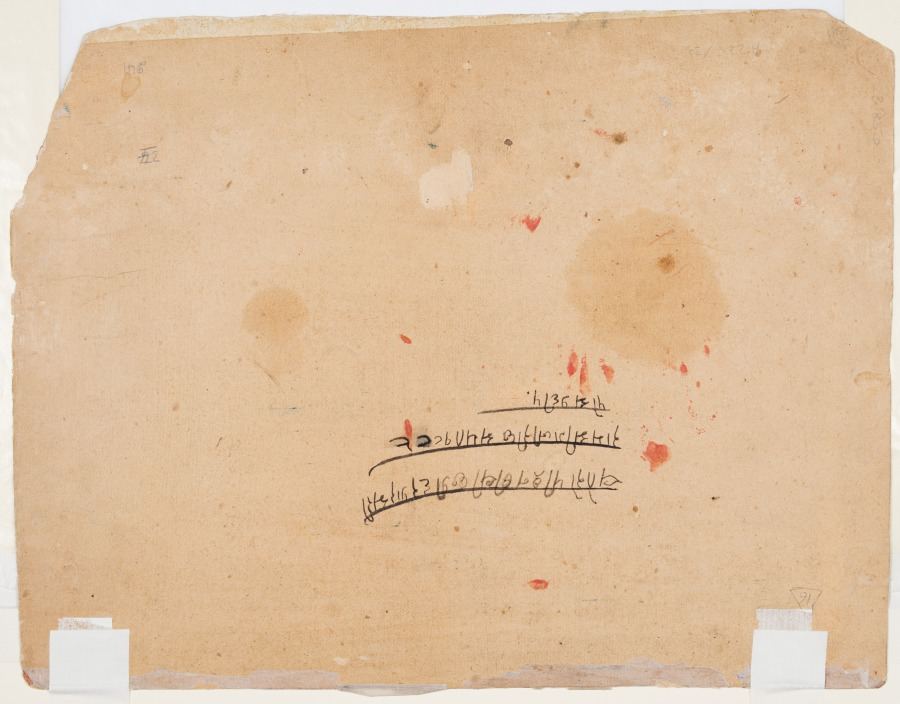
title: Maharao Ram Singh II of Kota (r. 1828–66) Hunting Buffalo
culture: Northwestern India, Rajasthan, Rajput Kingdom of Kota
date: 1832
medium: gum tempera, gold and silver on paper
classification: Painting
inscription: srī mahārājādhīrāja sarī rāma sīga jī darabāra kotā ko samata 1889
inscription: catero pīlancīthī (pīka ne līkhī) chabī darabāra sarī rāma sīga jī rī cha samata 1889 posa badi 5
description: In an energized hunting scene, the equestrian Maharaja Ram Singh smites a running buffalo with his sword. The Maharaja is supported by a hunting party, who carry various objects for the Rajput king’s vanity, including additional swords, a fly whisk, a parasol, and a canopy.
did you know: The Raja is heavily armoured for a buffalo hunt, perhaps symbolic of his financial prosperity.